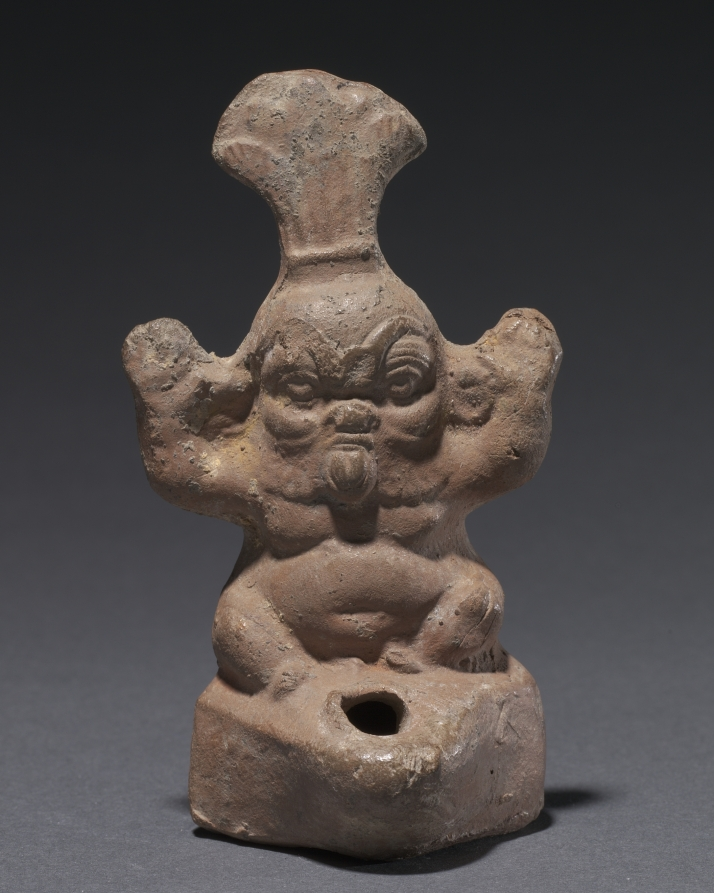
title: Bes Lamp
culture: Egypt, Greco-Roman period (332 BCE–395 CE)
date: 100 BCE–100 CE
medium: Nile silt clay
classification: Vessels